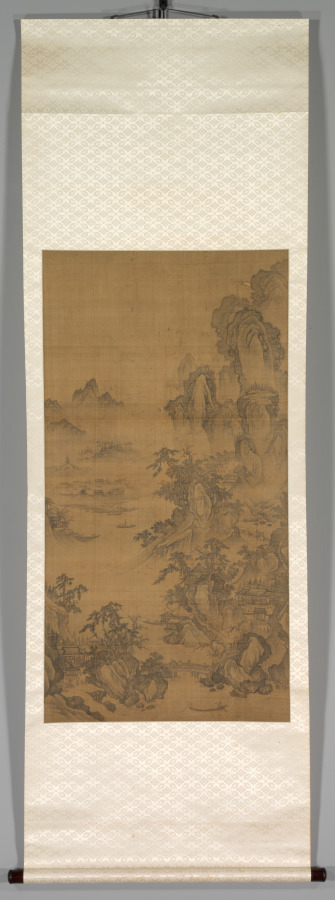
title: Mountain Market, Clear with Rising Mist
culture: Korea, Joseon dynasty (1392–1910)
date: early 1500s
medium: Hanging scroll; ink on silk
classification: Painting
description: This painting depicts several vignettes of the scholar-hermit’s various activities. In the lower left corner, the scholar-hermit is portrayed welcoming his guest in the courtyard. In the middle section on the lower bottom, the scholar and his guest are shown encountering another traveler on the bridge and exchanging their greetings. After crossing the bridge, the scholar visits a friend who lives in a compound of multiple buildings. The two friends decide to take a short walk. Both appear in a terraced cliff, enjoying a mountain vista and the fragrance of an old pine tree carried by the gentle wind. The scholar continues his journey with his two servants. They are portrayed crossing a winding wooden bridge. Right beyond the colossal rocky mountain, a panoramic view to a bustling market place unfolds, suggesting that it may be the place where the scholar-hermit’s entourage would visit. Perhaps the scholar need to buy items such as books, rolls of papers, and brushes, all essential to scholarly life. Toward the upper left corner, another group of travelers is landing on the river bank that leads to the city gate; they may be headed to the multistoried Buddhist stupa nestled on the top of the mountains.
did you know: Due to its stylistic features, this painting has long been believed to be a Chinese painting of the Northern Song period, dated to the 12th century.